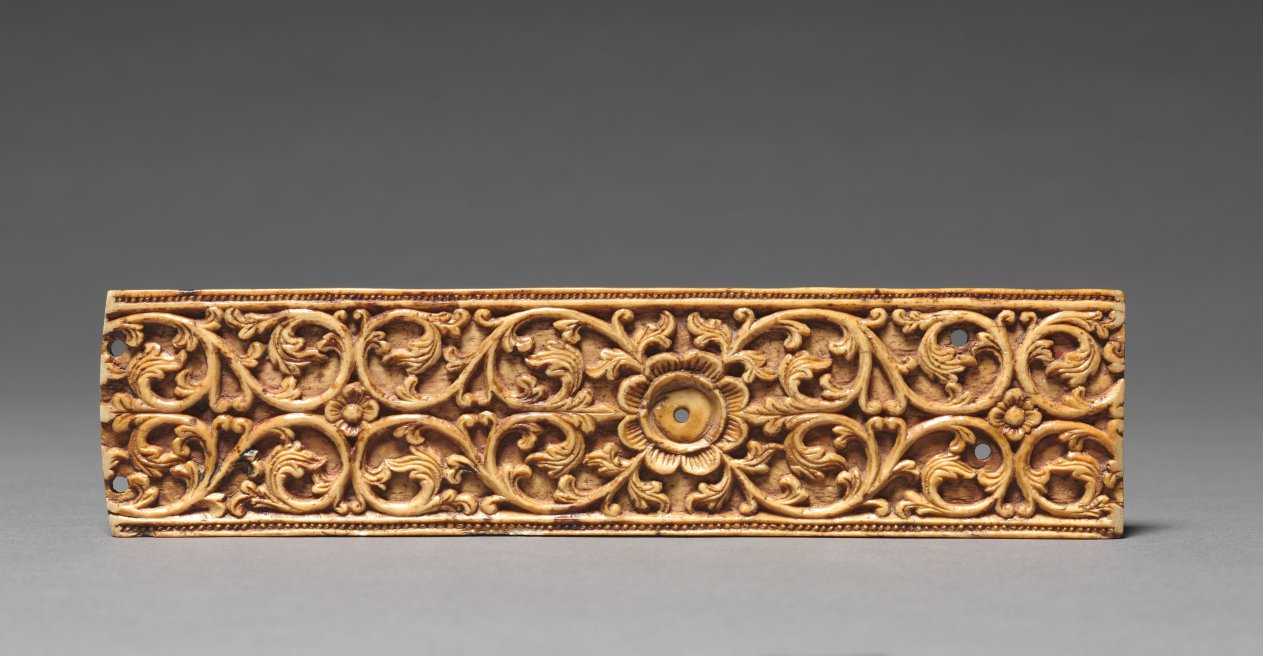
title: Cover of a Palm-Leaf Manuscript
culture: Ceylon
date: 1600s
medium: ivory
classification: Ivory